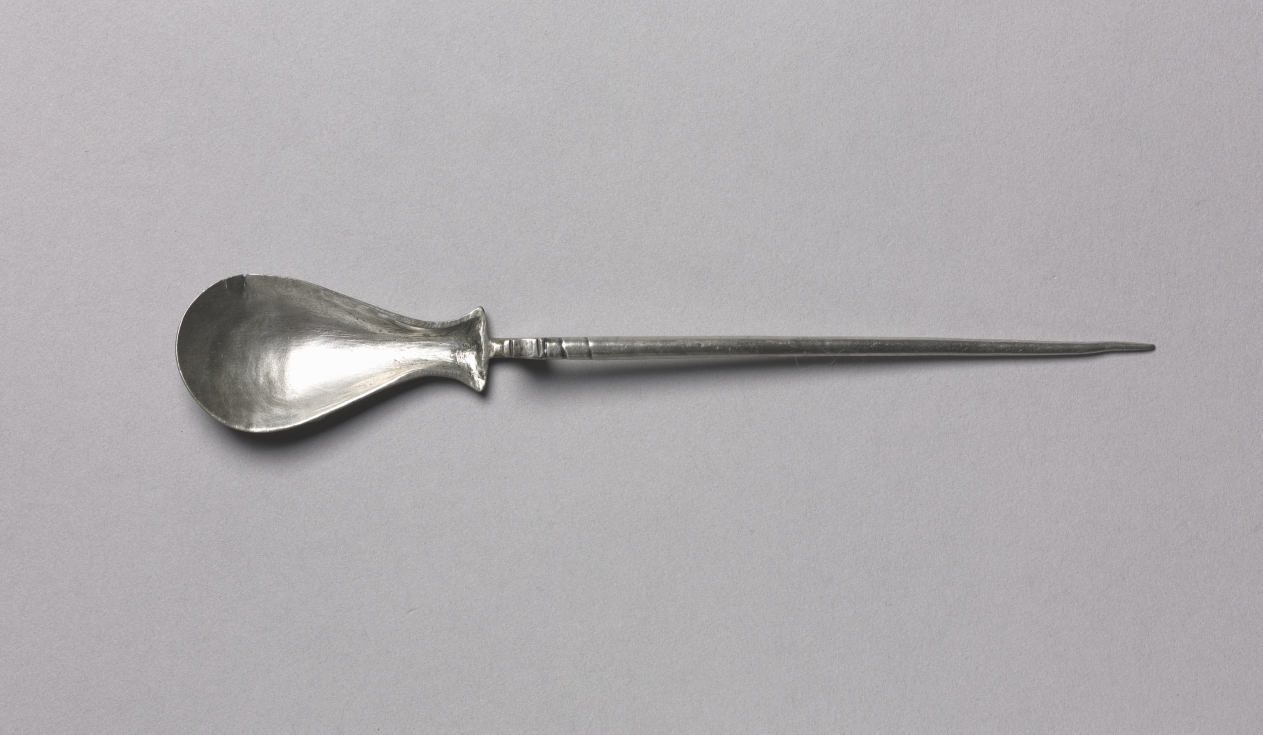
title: Spoon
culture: Byzantium, Syria(?), Byzantine period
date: 300s CE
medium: silver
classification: Metalwork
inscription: Greek inscription the center of the bowl.